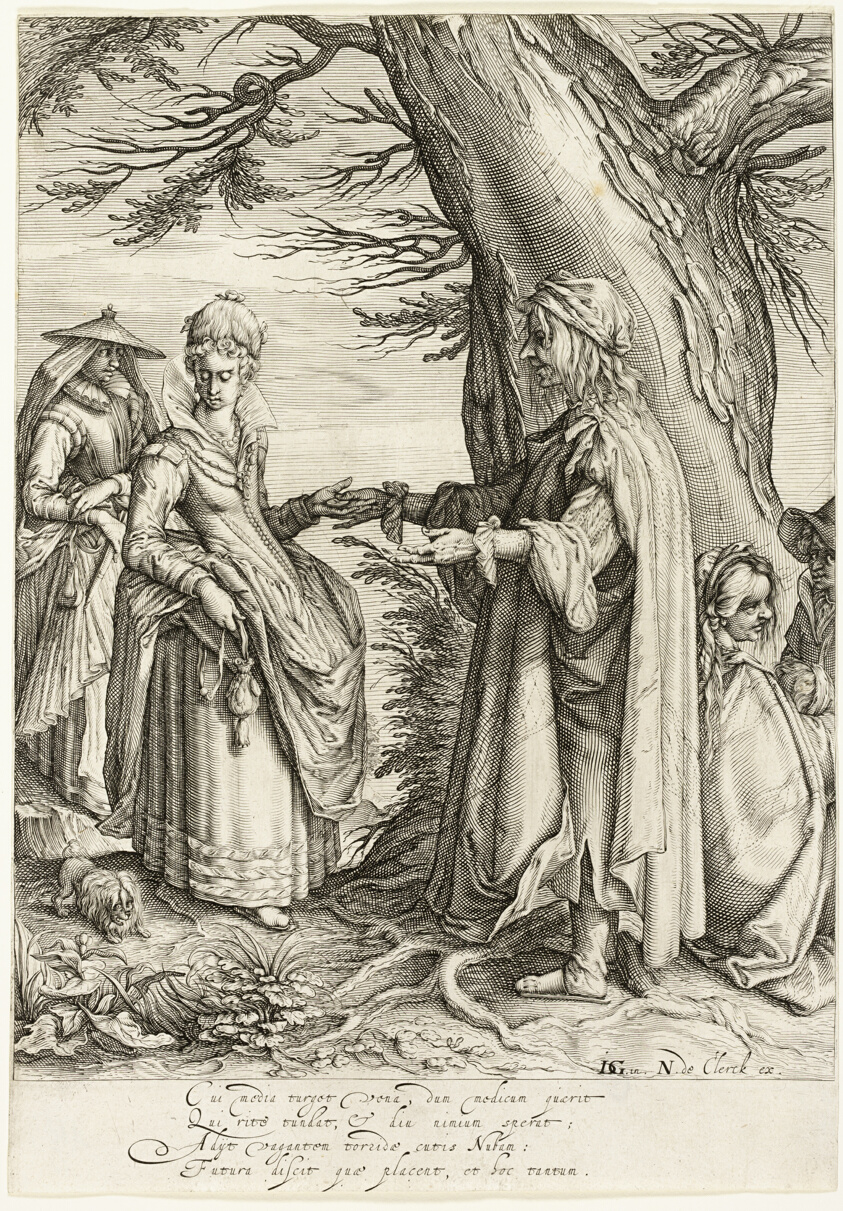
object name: Print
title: Fortune-Teller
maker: Andries Stock (Dutch, c. 1580-after 1648); after Jacques de Gheyn II (Dutch, 1565-1629)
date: c. 1608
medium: Engraving on cream laid paper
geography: Netherlands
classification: engraving; print; prints and drawing